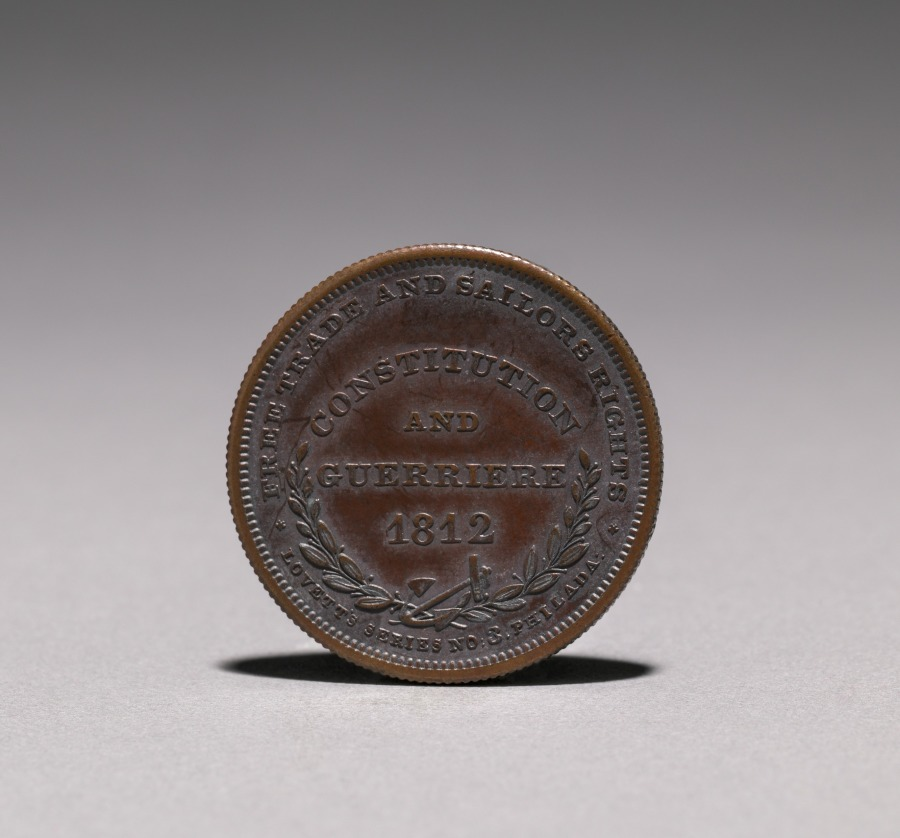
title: Medal: Constitution and Guerriere, 1812 (reverse)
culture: America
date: 1812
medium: bronze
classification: Metalwork